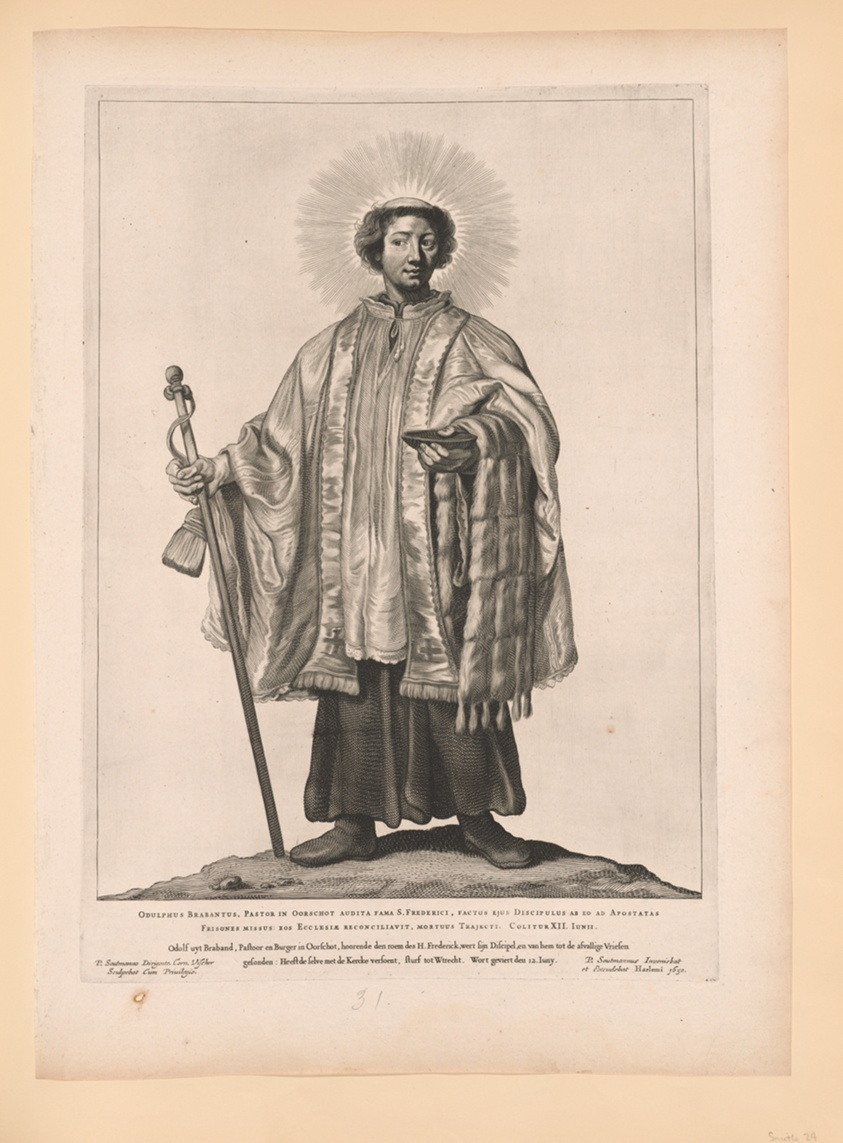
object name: Print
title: Saint Odulf, from Saints of the North and South Netherlands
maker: Cornelis Visscher (Dutch, c. 1629-1658); after Pieter Claesz. Soutman (Dutch, c. 1580–1657)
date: 1650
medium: Engraving on paper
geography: Netherlands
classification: engraving; paper; print; prints and drawing